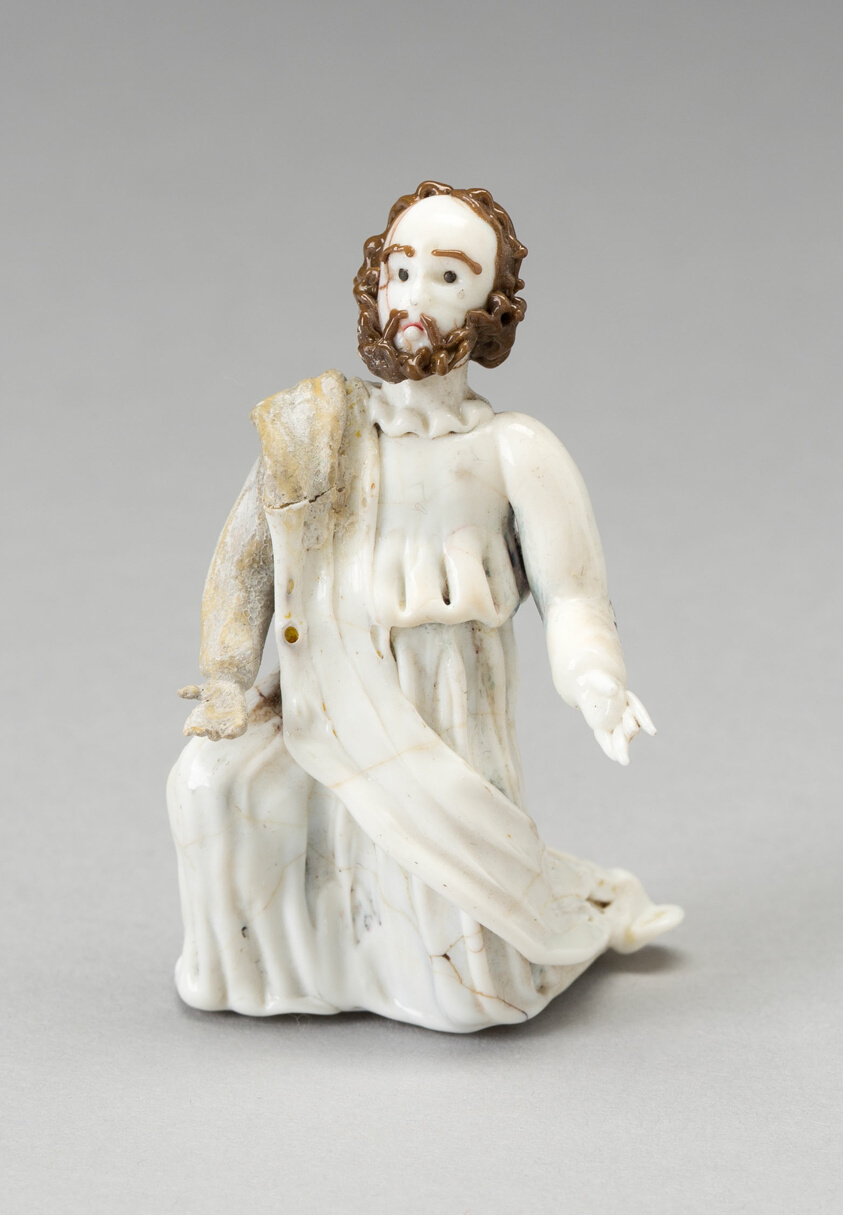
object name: Glass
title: Man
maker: Nevers, France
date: 18th century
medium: Glass; lampwork (verre de Nevers), metal armature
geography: France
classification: decorative object/ornament; lampwork; glass; european decorative arts